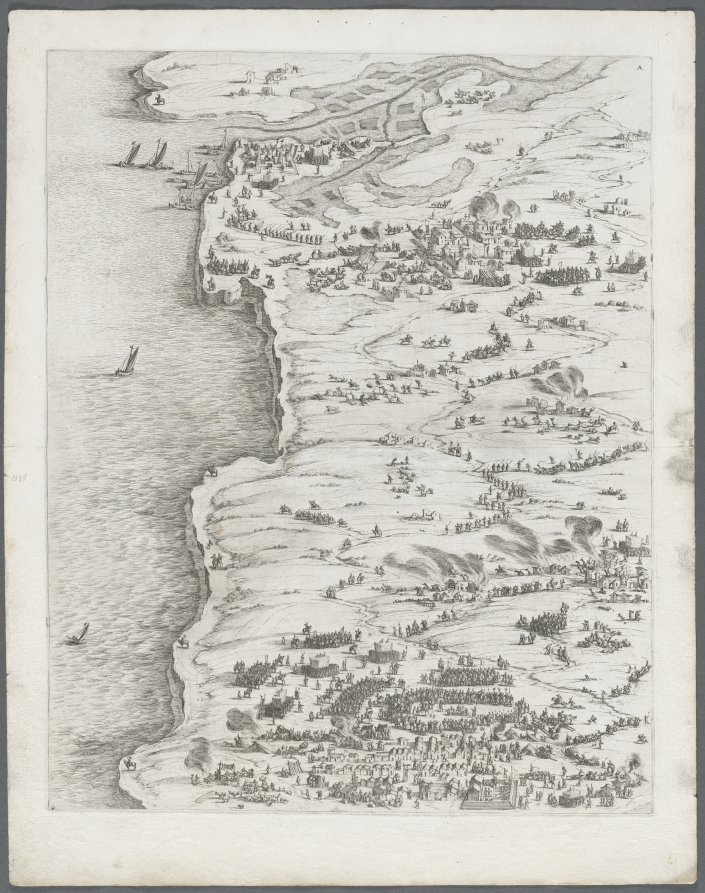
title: The Siege of La Rochelle: Plate 5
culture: France, 17th century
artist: assistant of Jacques Callot (French, 1592–1635)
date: 1628–1630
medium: etching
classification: Print